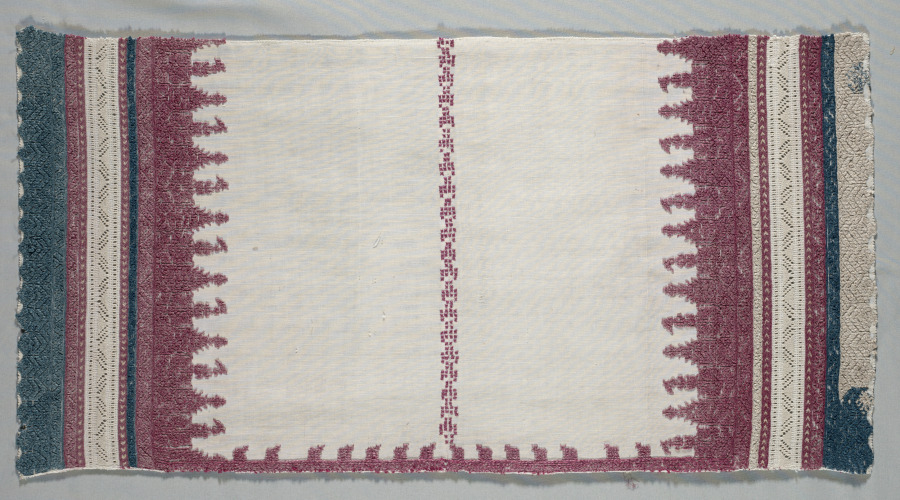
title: Furnishing textile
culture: Africa, North Africa, Morocco, Salé, Moroccan embroiderer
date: 1800s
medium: Cotton, silk, dye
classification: Embroidery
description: This densely embroidered textile was possibly used as a pillow cover. The elongated motifs have been interpreted by scholars as trees, storks, or minarets (tall towers of a mosque). The use of these motifs is sometimes referred to as the "Old Salé" style, named for the city in which it was made.